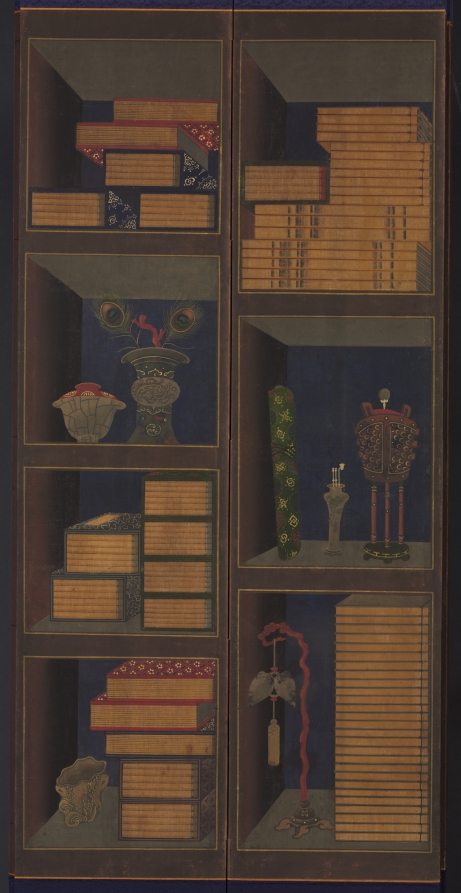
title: Books and Scholars’ Accoutrements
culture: Korea, Joseon dynasty (1392–1910)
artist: Yi Taek-gyun (Korean, 1808–after 1883)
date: late 1800s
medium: ten-panel folding screen; ink and color on silk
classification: Painting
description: First produced around the second half of the eighteenth century, chaekgado (literally, “pictures of bookshelves”) flourished throughout the 1800s as a royal emblem. And soon this pictorial genre became a popular furnishing item for aristocrats' elegant studies. The third panel from the right bears a hidden seal that reveals the artist: Yi Taek-gyun, a prominent court artist active in the late 1800s.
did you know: A convincing hypothesis that connects the Korean chaekgado tradition with the Renaissance tradition of illusionistic studiolo through the technique of trompe-l'œil and Chinese Qing period treasured cabinet paintings was first made in Park Shim-eun's thesis (2002).